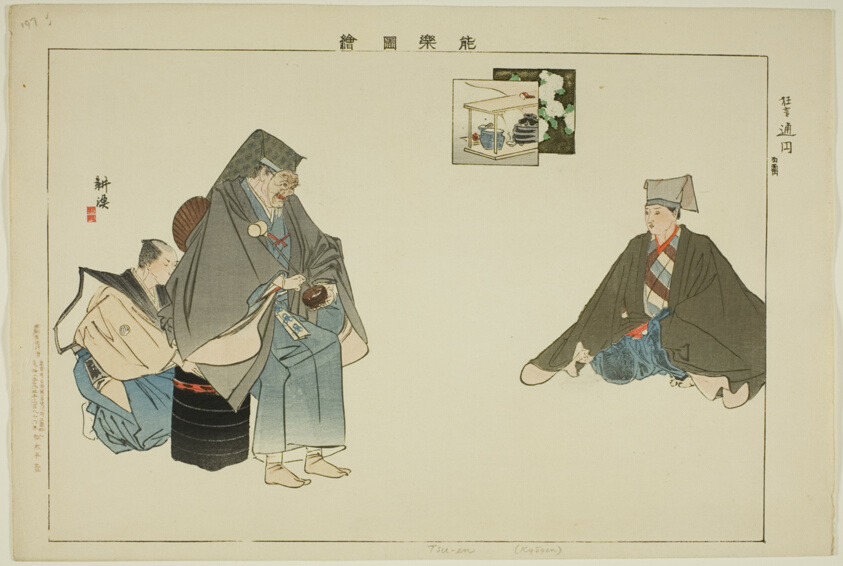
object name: Print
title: Tsuen (Kyogen), from the series "Pictures of No Performances (Nogaku Zue)"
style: Japanese (culture or style)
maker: Tsukioka Kogyo; Japanese, 1869-1927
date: 1898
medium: Color woodblock print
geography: Japan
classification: woodblock print; print; asian art